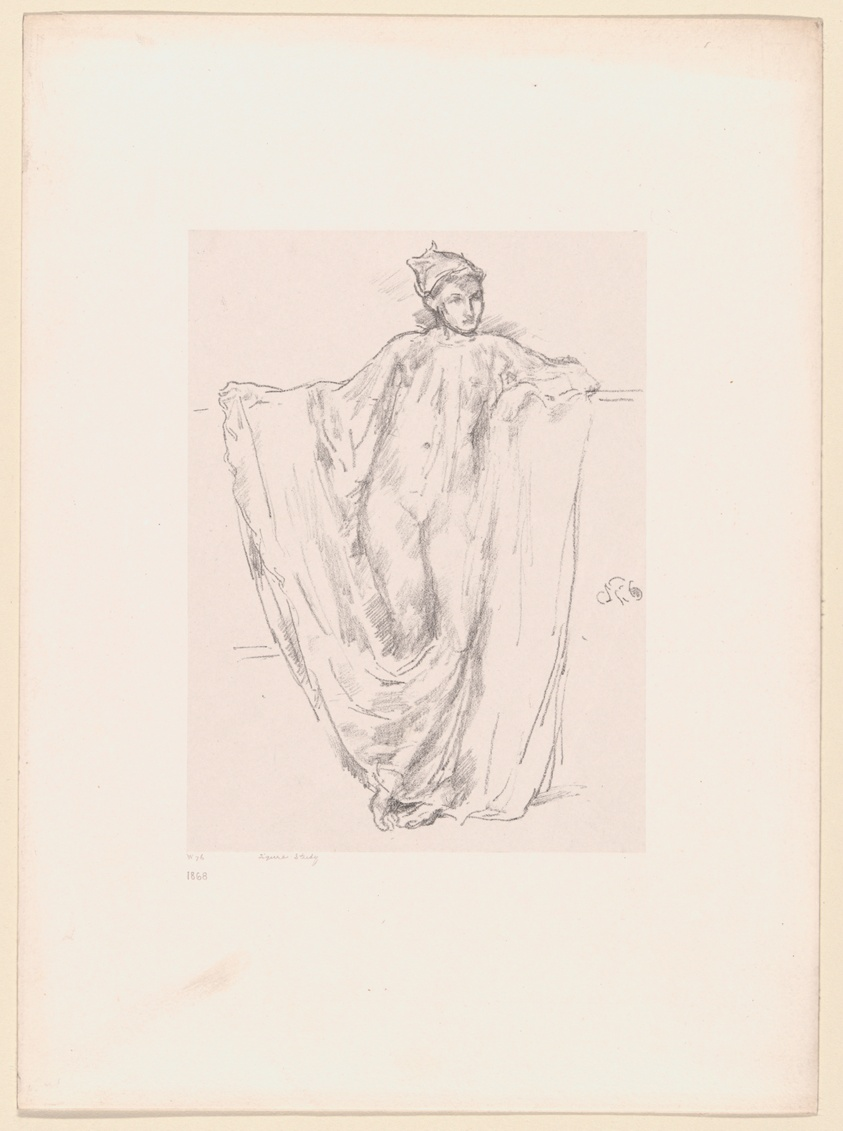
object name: Print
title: Figure Study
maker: James McNeill Whistler (American, 1834-1903)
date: 1894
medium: Transfer lithograph in black on grayish white chine, laid down on white plate paper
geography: United States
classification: transfer lithograph; lithograph; print; prints and drawing; paper